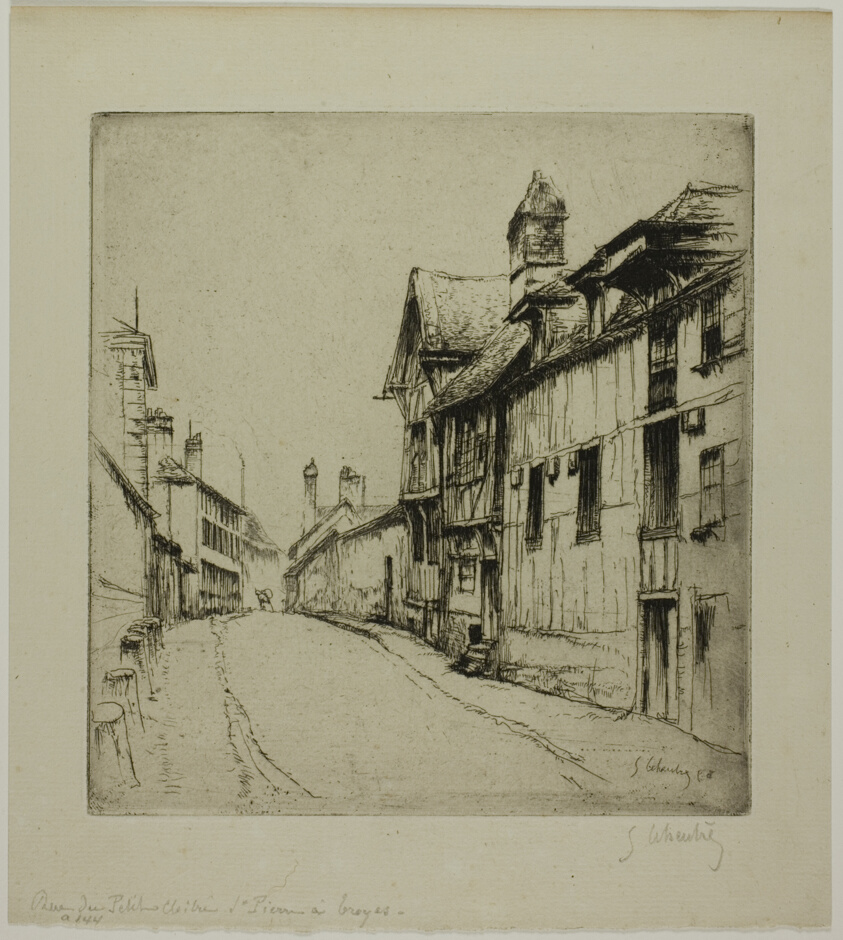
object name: Print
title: The Little Cloister Street, Troyes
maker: Gustave Leheutre (French, 1861-1932)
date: 1896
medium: Etching and plate tone on ivory laid paper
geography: France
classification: etching; print; prints and drawing